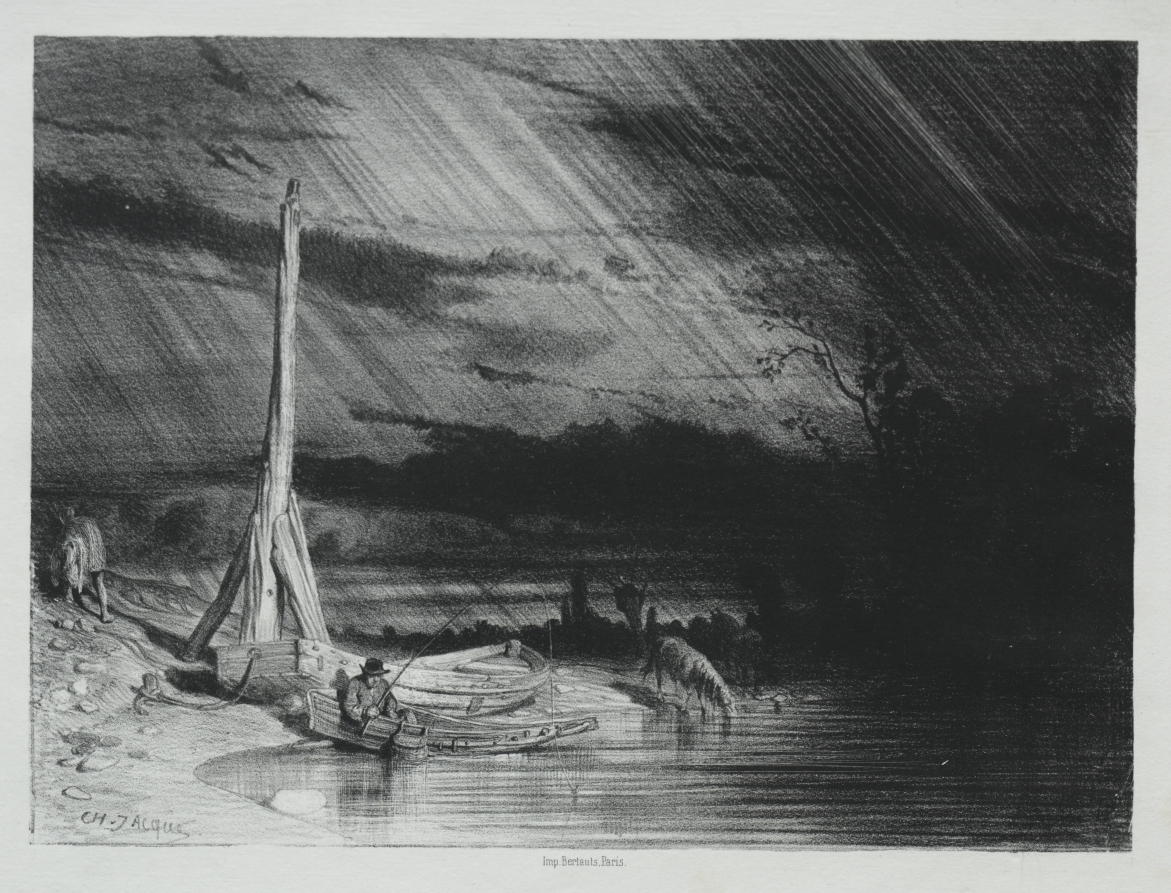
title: The Fisherman, Rainy Weather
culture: France, 19th century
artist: Charles-Émile Jacque (French, 1813–1894)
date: 1847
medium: lithograph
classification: Print